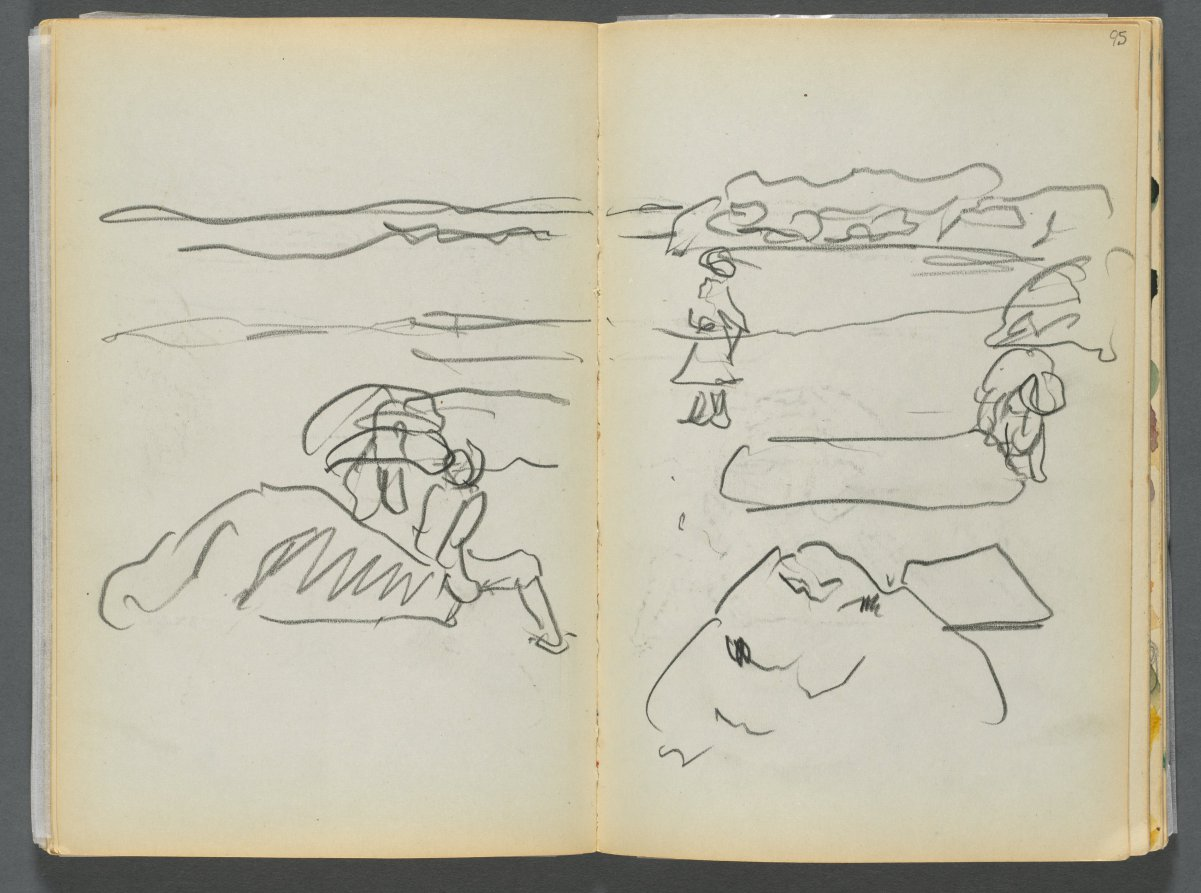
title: Sketchbook- The Granite Shore Hotel, Rockport, page 094 & 95: Beach View with Figures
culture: America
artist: Maurice Prendergast (American, born Newfoundland [now Canada], 1858–1924)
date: 1905–10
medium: graphite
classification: Bound Volume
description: This sketchbook contains 72 pages of pencil drawings and 9 watercolors of Cape Ann. On the inside of the cover Prendergast wrote the address of the Granite Shore Hotel in Rockport, Massachusetts.